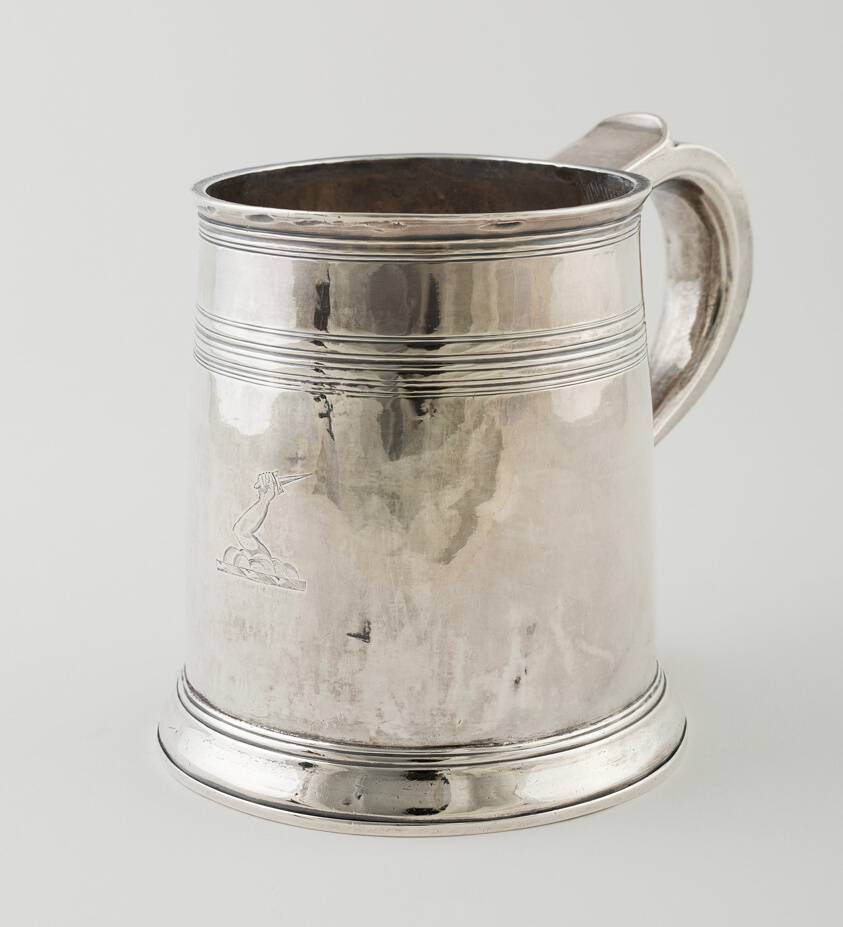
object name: Metalwork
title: Mug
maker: John Martin Stocker and Edward Peacock; English; London, England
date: 1706/07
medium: Silver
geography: London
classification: silver; metalwork; european decorative arts